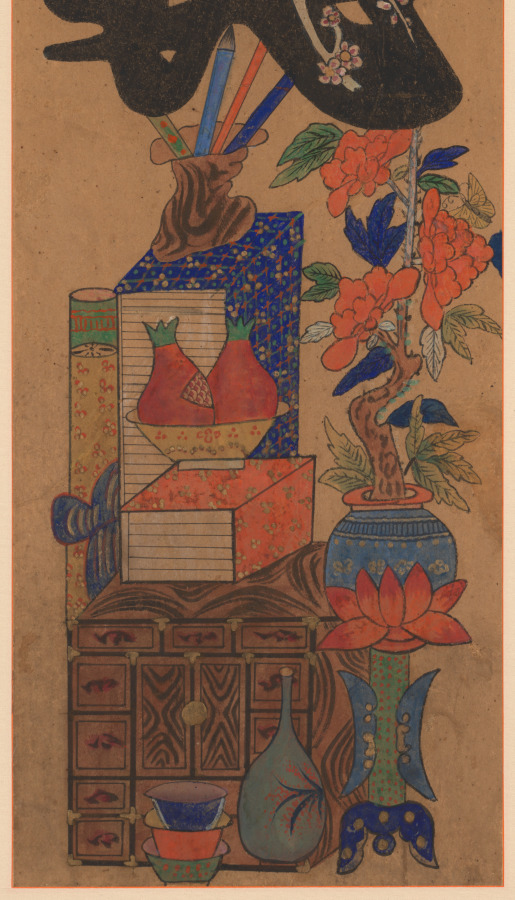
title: Munja-Chaekgeori Screen (Character-Books Screen)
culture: Korea, Joseon dynasty (1392–1910)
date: early 1900s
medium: Eight-panel folding screen, ink on paper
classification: Painting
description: This folding screen is a whimsical harmony of two different subjects: chaekgeori, or books and things; and munja, or characters. The lower section of each panel depicts the imagery of things, including books, decorative arts, and utilitarian objects. The upper portion of each panel bears a classical Chinese character. Read from far right to left, the eight characters refer to the values of Confucian teachings of the Joseon dynasty: filial piety, brotherly love, loyalty, trust, propriety, righteousness, modesty, and humility. While these two pictorial genres are harmoniously conjoined on the same picture plane, two sharply contrasting world views—urban consumerism and traditional Confucian ethics that despise materialism—compete with one another.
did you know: The eight Korean characters each mean filial piety, brotherly love, loyalty, trust, propriety, righteousness or justice, modesty or integrity, and humility or the feeling of shame.